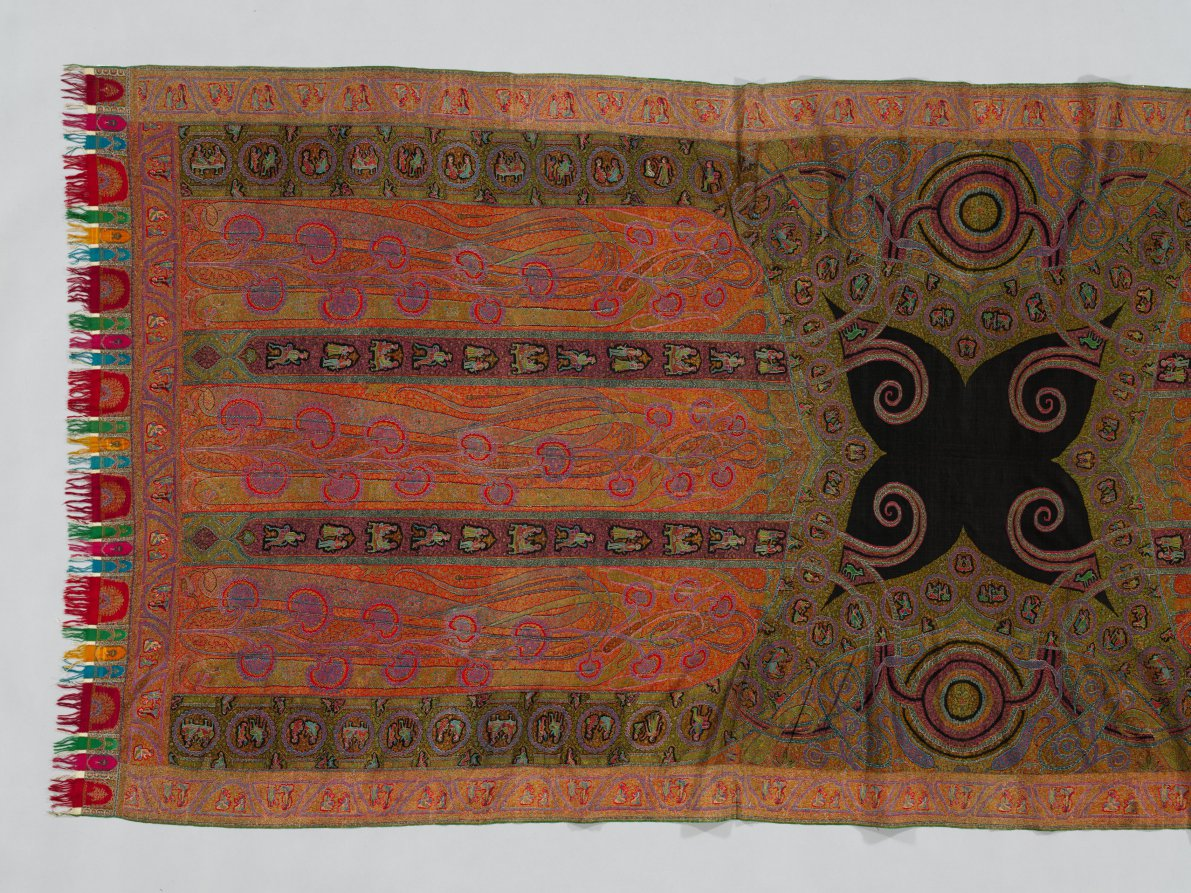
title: Long shawl with woven figures and animals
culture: India, Kashmir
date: c. 1885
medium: 2/2 twill tapestry weave, double interlocked and pieced: wool (possibly pashmina)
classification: Textile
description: Kashmir shawls from India were status symbols in Europe during the 1800s, and few are as rare as this woven example. Over 200 human figures take part in drinking, smoking, dancing, and falconry in the Indian princely scenes that enliven the shawl’s borders and four dark stripes. The stripes alternate with large elongated boteh, or paisley, motifs that intertwine with blossoming stems in a European style adapted by Kashmiri textile artists. This extraordinary woven shawl was probably made to dazzle the jury at one of the European expositions of industrial products, as almost all other figural shawls were embroidered. It was woven in many pieces and then skillfully joined with colorful harlequin end borders.